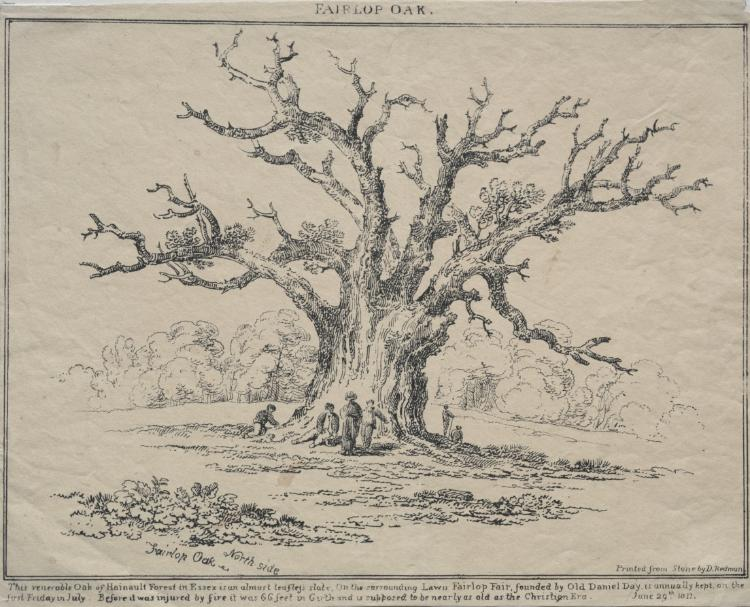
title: Fairlop Oak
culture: England, 19th century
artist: D. H. Redman (British)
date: 1811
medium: lithograph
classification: Print